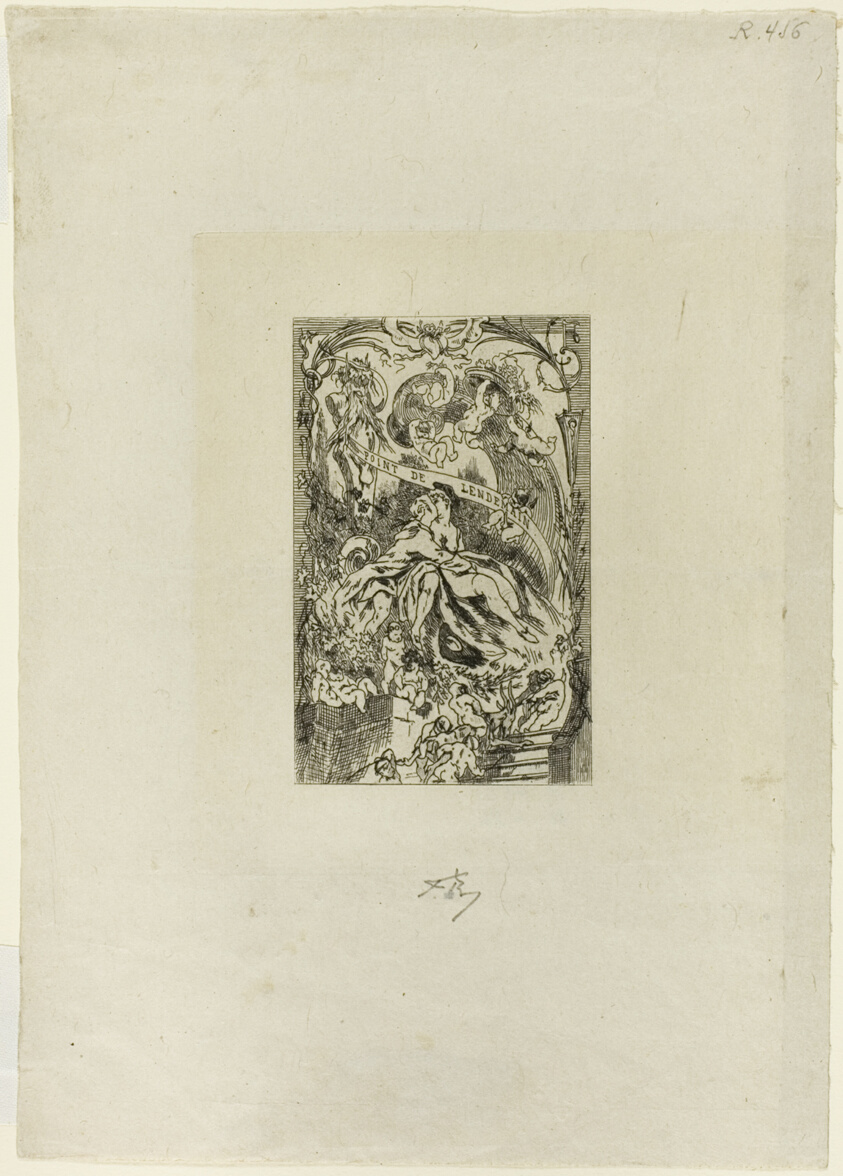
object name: Print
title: Frontispiece for Point de lendemain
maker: Félicien Rops (Belgian, 1833-1898); written by Dominique-Vivant Denon (French, 1747-1825)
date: 1867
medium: Etching on gray China paper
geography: Belgium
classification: etching; print; prints and drawing